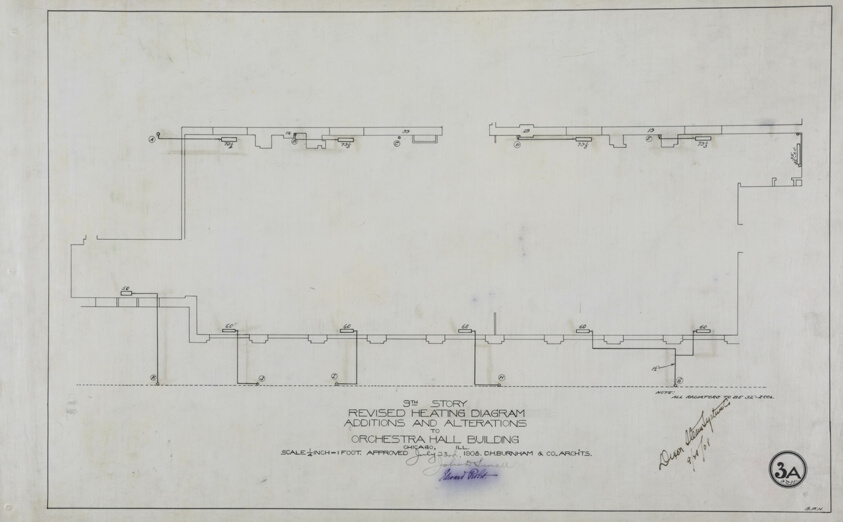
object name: Architectural Drawing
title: Orchestra Hall Heating Revisions, Chicago, Illinois, Diagrams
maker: D.H. Burnham & Company; American, 1896–1912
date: 1908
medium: Ink on linen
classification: architecture; architectural drawing